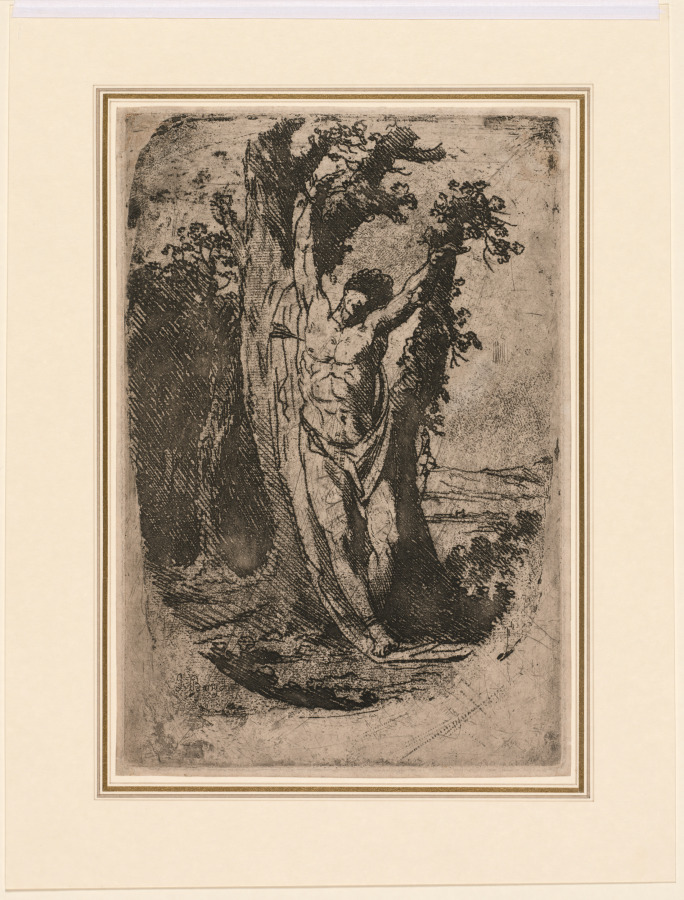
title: Saint Sebastian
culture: Ireland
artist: James Barry (Irish, 1741–1806)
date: c. 1776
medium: Soft-ground etching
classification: Print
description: Irish artist James Barry made drawings from the works of Michelangelo and other masters while in Rome between 1765 and 1771, at a time when studying from Renaissance masters in Italy was central to artistic training. The muscular body and twisting position of Saint Sebastian—who was martyred for his faith by being shot with arrows—recall Michelangelo’s dynamic male nudes. This is the only known impression of this print. Printed by Barry himself, it demonstrates his experimentation with soft-ground etching to imitate the effect of chalk drawing.